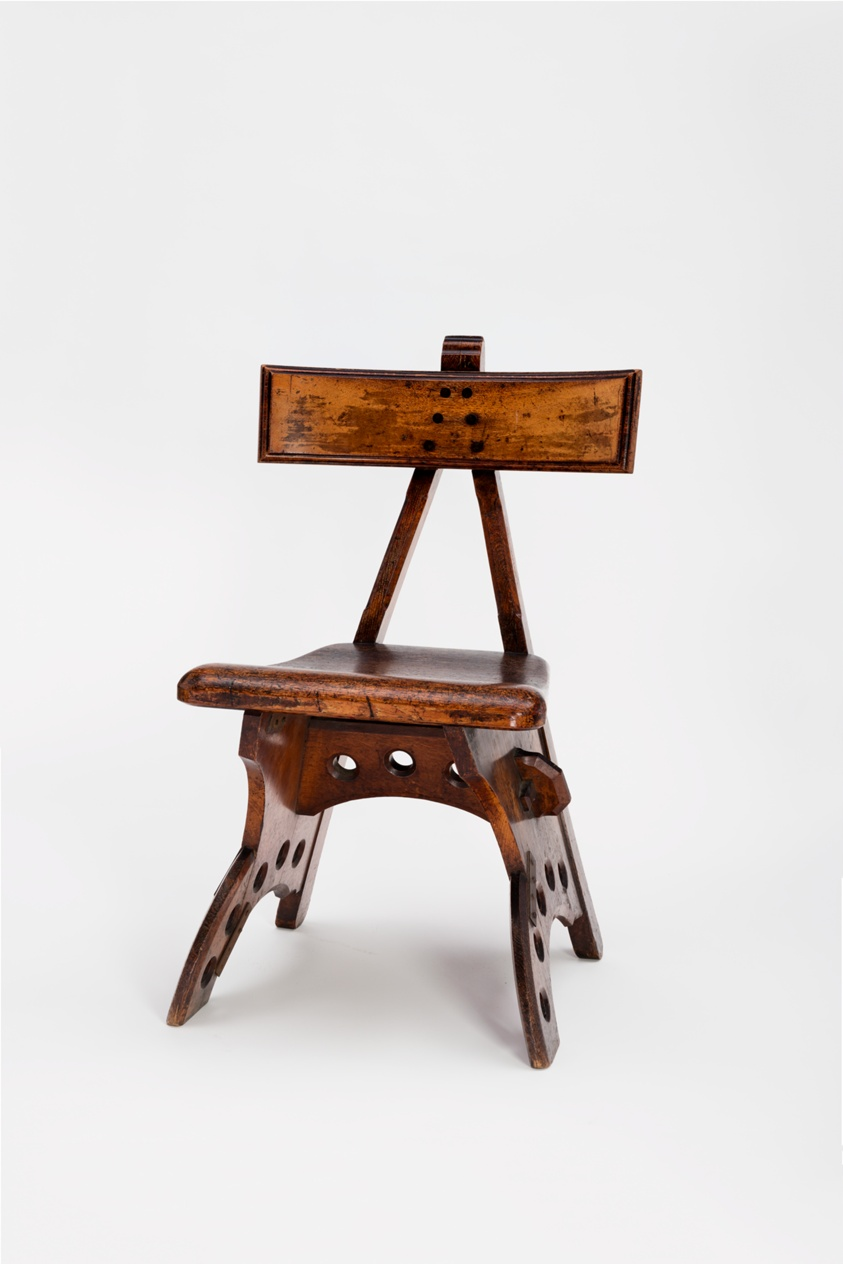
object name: Furniture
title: Side Chair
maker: Designed by Edward Welby Pugin; English, 1834–1875; Made by South East Furniture Company, Ramsgate, Kent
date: c. 1870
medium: Oak and ebony with later iron plate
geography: England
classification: furniture